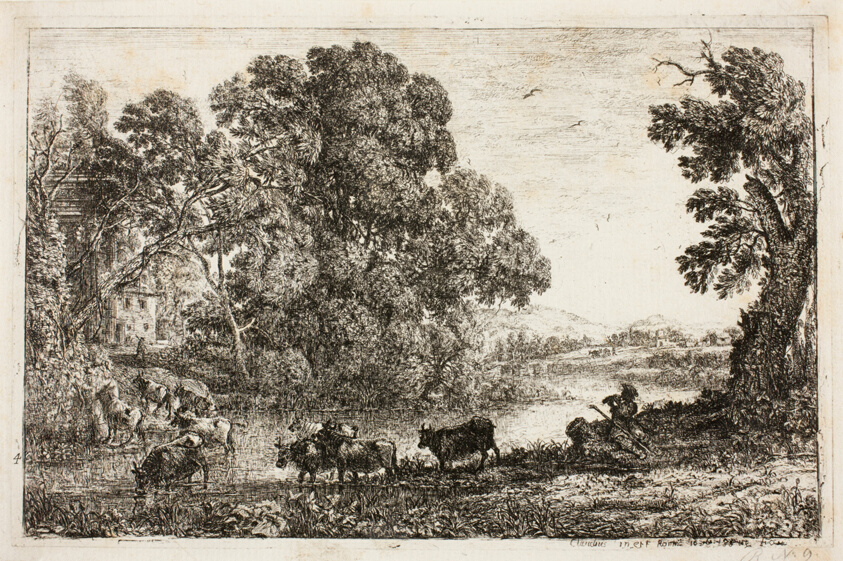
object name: Print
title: The Cowherd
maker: Claude Lorrain (French, 1600-1682)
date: 1636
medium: Etching on ivory laid paper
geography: France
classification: etching; print; prints and drawing